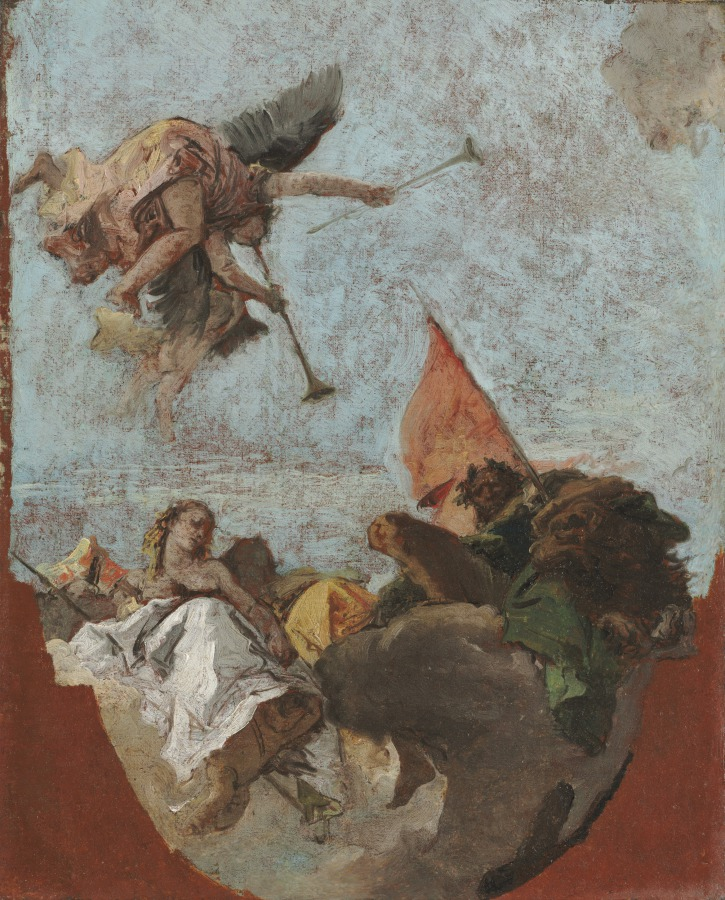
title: Sketch for a Ceiling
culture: Italy, 18th century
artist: Giovanni Battista Tiepolo (Italian, 1696–1770)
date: 1750s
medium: oil on canvas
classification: Painting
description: This small, quickly painted picture is typical of the sketches Tiepolo made as studies for larger compositions. When completed full-scale on a ceiling, works like these give the impression of a massive window, through which one can see angels or mythological beings floating among the clouds. Although we know from the work's shape that it was a study for a ceiling painting, it is not related to any of Tiepolo's finished architectural decorations. Tiepolo used such sketches to explore design problems, experiment with form and color, or give his clients an idea of how a finished project would look. With the help of a large workshop, which included two of his sons, Tiepolo completed a number of painted ceilings and decorative schemes across Europe.